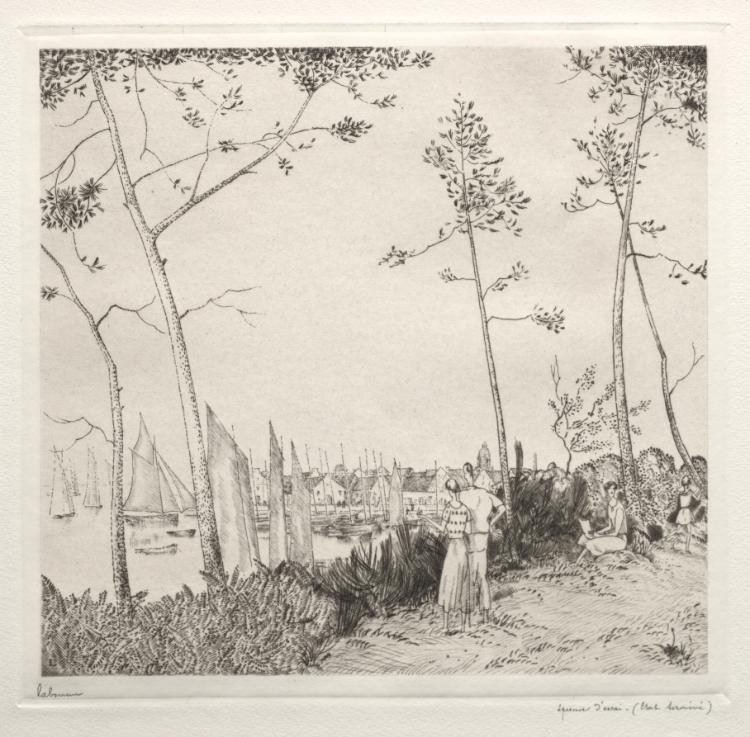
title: La Promenade sur le Port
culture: France, 20th century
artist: Jean-Émile Laboureur (French, 1877–1943)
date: 1935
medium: etching and line engraving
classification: Print